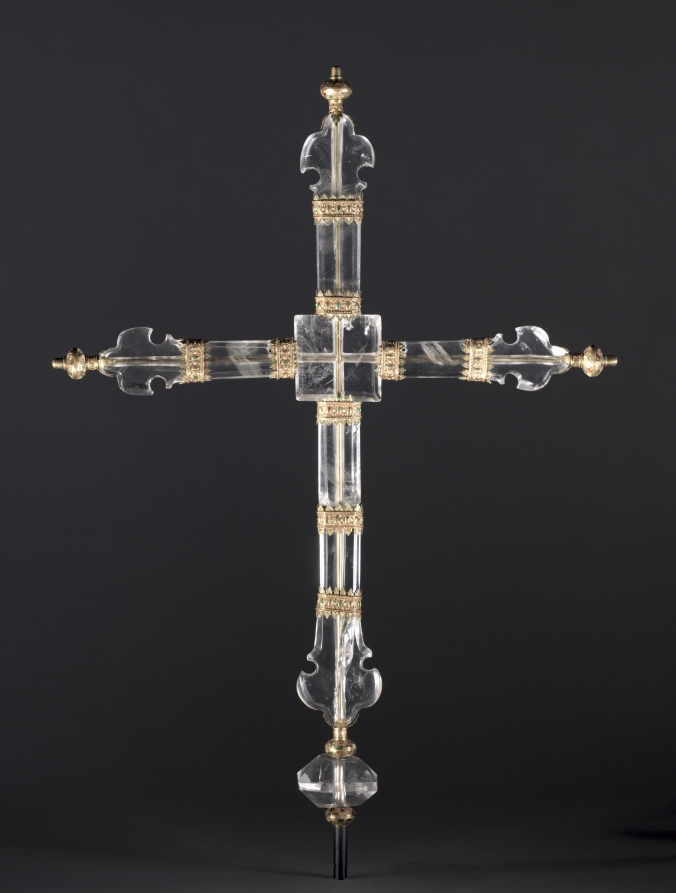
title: Cross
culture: Italy, Venice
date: c. 1280–1300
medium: rock crystal, painted gold mounts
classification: Stone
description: This cross consists of rock crystal pieces drilled through their centers and fastened together with a golden rod. Where they join, the pieces of crystal are bound with decorative bands of painted gold. Venice was one of the most important centers of rock crystal cutting at the end of the 1200s. The cross was undoubtedly intended for prominent display on an altar and may have also been used in liturgical processions. The cross was at one time in the Royal Treasury of Saxony and purportedly first belonged to Rudolph I of Habsburg (reigned 1273–91).